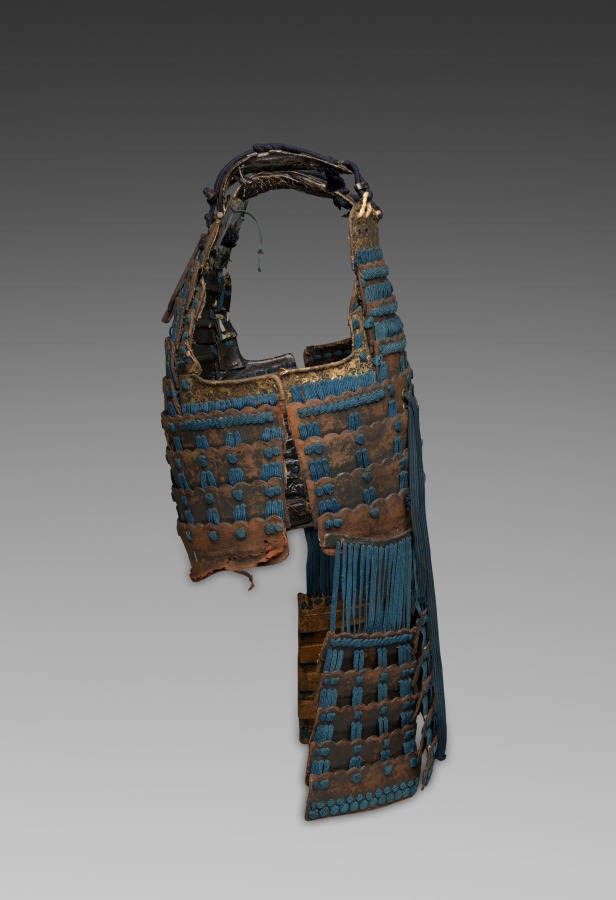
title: Cuirass (Dō)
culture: Japan, Edo period (1615–1868)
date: 1615–1868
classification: Arms and Armor